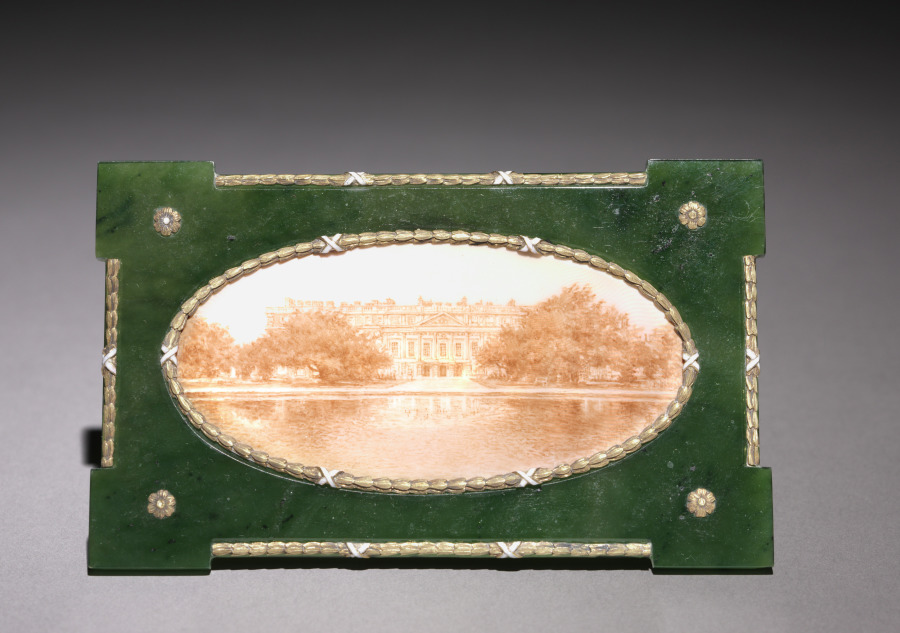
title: Framed Miniature of Hampton Court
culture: Russia, St. Petersburg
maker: House of Fabergé (Russian, 1842–1918)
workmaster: Henrik Wigström (Russian, 1862–1923)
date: c. 1905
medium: jade, gold, enamel, ivory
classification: Miscellaneous